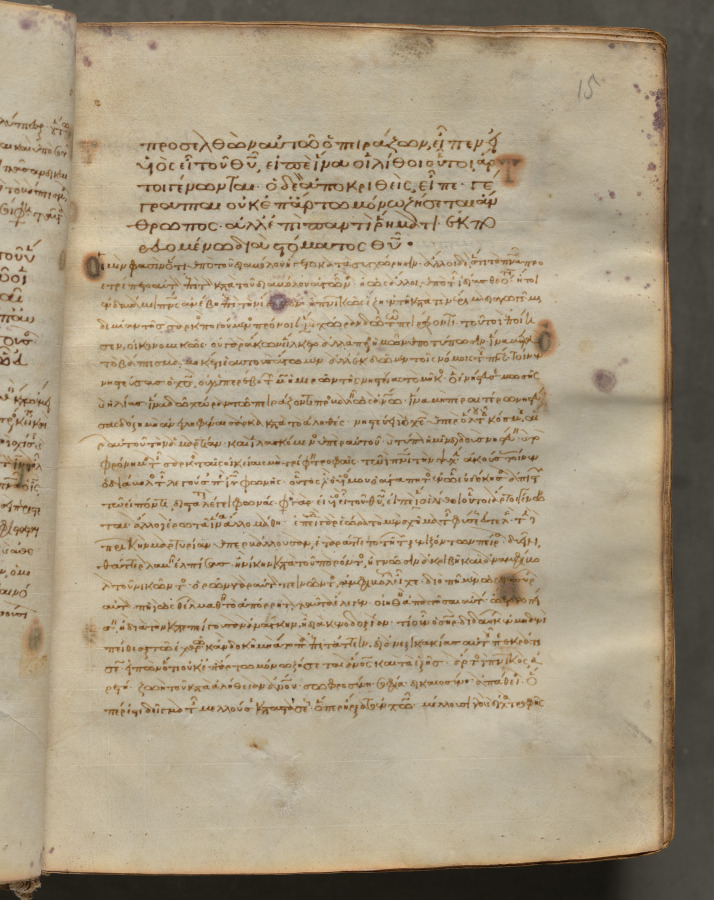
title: Text, folio 15 (recto), from a Gospel Book with Commentaries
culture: Byzantium, Constantinople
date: c. 1000–1100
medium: ink, tempera, and gold on vellum; leather binding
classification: Bound Volume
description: Each of the four gospels in this book opens on a page with brilliantly illuminated borders depicting the author of the text as well as birds-principally peacocks, symbols of the immortality of the soul-and fountains, representing the fountain of life and the salvation of the soul. This volume consists of 428 leaves with texts in Greek. Its level of sophistication suggests that it was probably written and decorated in a monastery in Constantinople.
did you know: Gospel Books were carried in procession through Byzantine churches.